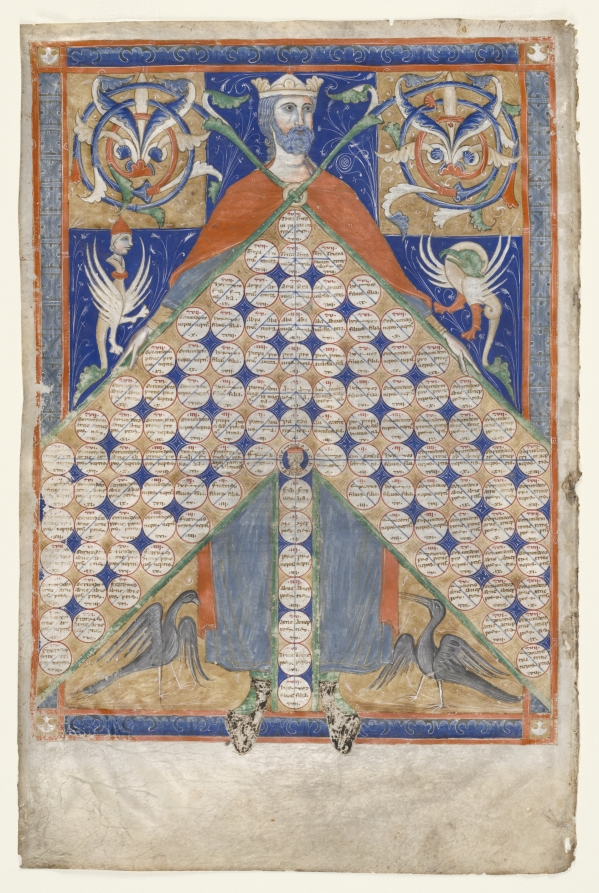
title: Leaf from Gratian's Decretum: Table of Consanguinity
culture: Italy, probably Naples, 13th century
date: c. 1270–1300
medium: ink, tempera and gold on parchment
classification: Manuscript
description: These leaves were excised from a copy of the handbook of canon law known simply as the Decretum written by Gratian, an Italian Camaldolese monk, in Bologna around 1130–40. The Decretum was widely copied and consulted throughout the Middle Ages. Consanguinity diagrams were used to show the degree of kinship between an individual and his or her "blood" relations. These tables followed an established tradition dating back to around 600 CE. Until church law was relaxed in 1215, a marriage could only be contracted by persons separated by seven degrees of relationship. After 1215 the degree of separation was reduced to four. Tables of Consanguinity were therefore used by church officials to regulate marriage.